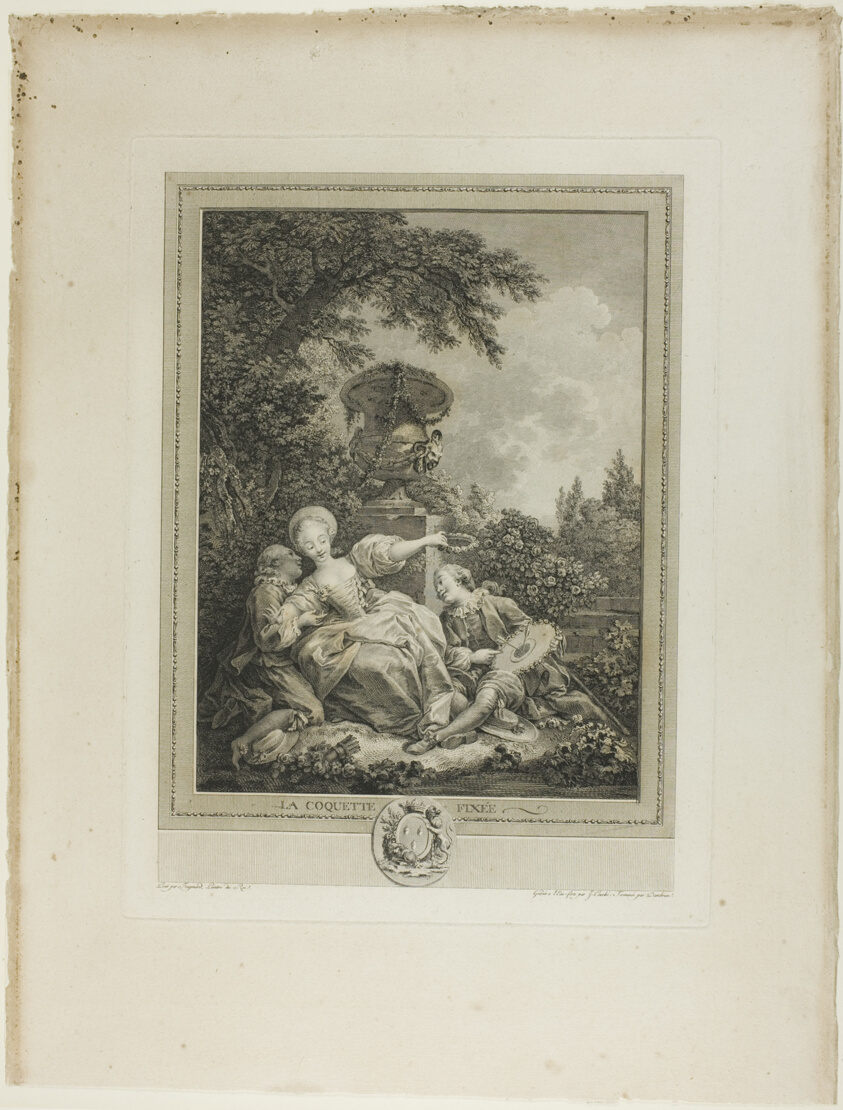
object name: Print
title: La Coquette Fixee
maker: Jacques Couché (French, born 1750); after Jean-Honoré Fragonard (French, 1732-1806)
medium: Etching on paper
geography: France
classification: etching; print; prints and drawing